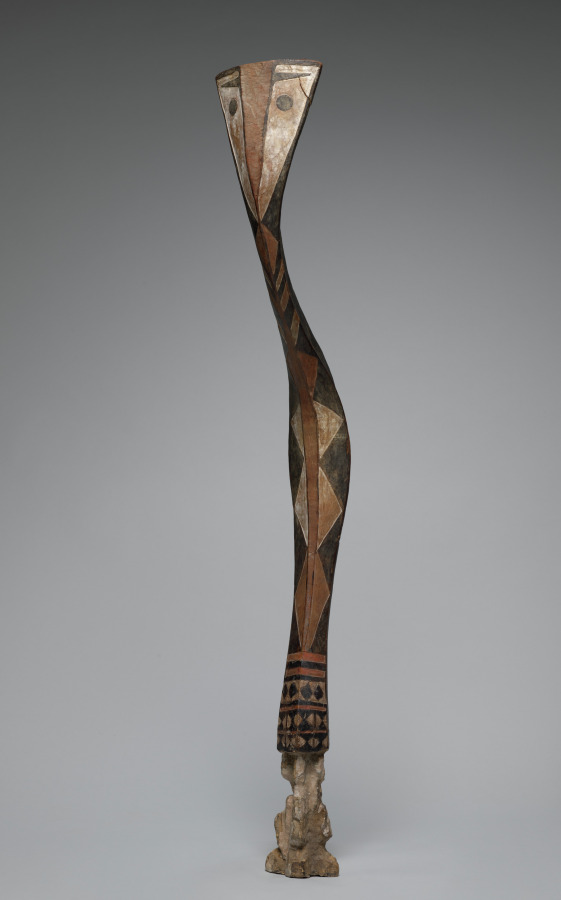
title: Serpent Headdress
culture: Africa, West Africa, Guinea, possibly Baga-style maker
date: late 1800s–early 1900s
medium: Wood (Nauclea pobeguinii) and paint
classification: Mask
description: Traditionally, Baga society was ruled by village councils of elders who derived their power from their direct contact with spirit entities through lifelong initiation rituals and the accumulation of secret knowledge. Two different religious orders controlled initiations, providing the context for much Baga art. One was identified as female, the other as male, though only men belonged to both groups. Initiations in each order followed three stages, culminating in the revelation of the highest spirit being. This type of Baga headdress embodied the serpent spirit Ninkinanka, honored for giving rain, bestowing riches, and bringing forth children. The serpent figure would be placed on top of a conical framework of palm branches carried on a male dancer’s head. It appeared at the end of the first level of the initiation for boys and girls or just before the circumcision at the beginning of the boys’ initiation.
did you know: In the context of boys' initiations, the serpent headdress was sometimes identified as the rainbow, which the Baga and their neighbors associate with beginnings and endings, life and death, and the continuation of lineages.